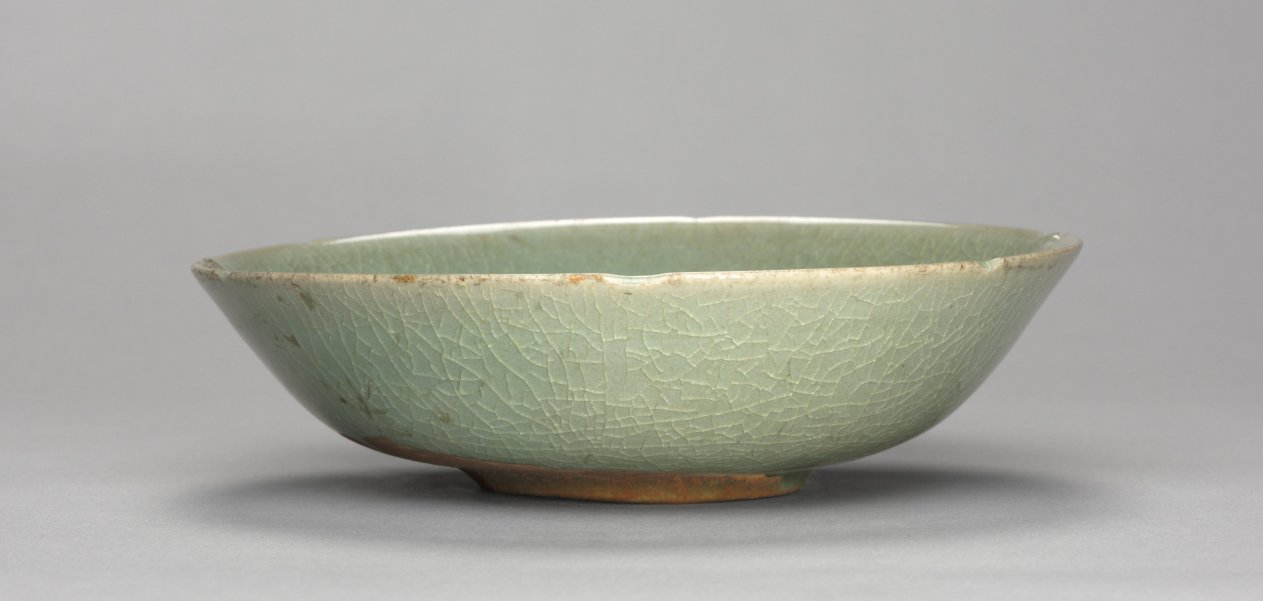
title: Crackle-glazed Bowl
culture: Korea, Goryeo dynasty (918–1392)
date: 1100s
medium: pottery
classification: Ceramic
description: During the Goryeo period (918–1392), about 260 kilns operated in mainly Jeolla and Chungcheong provinces, meeting a high consumer demand. Celadon wares used for everyday such as this bowl were among the most common burial objects in tombs of the elites. Furnishing tombs with an elaborate assemblage of objects was believed to honor and comfort the newly dead. Generally, Goryeo tombs were left untouched until the late 1800s. During the colonial period (1910–45), however, Japanese archaeologists competitively excavated the tombs located in Kaeseong, the former capital of the Goryeo period, and these wares soon became available for Japanese and Western collectors.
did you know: The crackle pattern that appears all over this bowl was caused by a thermal expansion mismatch between the body and the glaze.